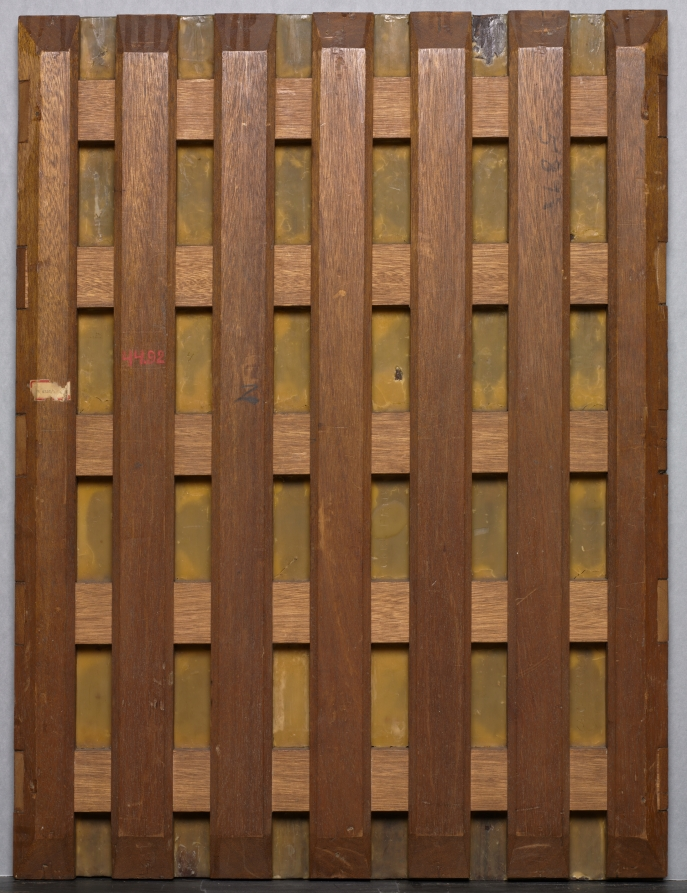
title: Portrait of a Woman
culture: Italy, 16th century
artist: circle of Andrea del Sarto (Italian, 1486–1530)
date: c. 1518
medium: oil on wood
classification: Painting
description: King Francis I’s deep interest in Italian Renaissance culture manifested itself not only through acquiring important works of art but also by bringing leading architects, scholars, and artists to Paris. Chief among these figures was the Florentine painter Andrea del Sarto. The sitter’s distinctively French hood and black veil suggest that someone talented closely connected to the artist painted this work during his brief time in France.